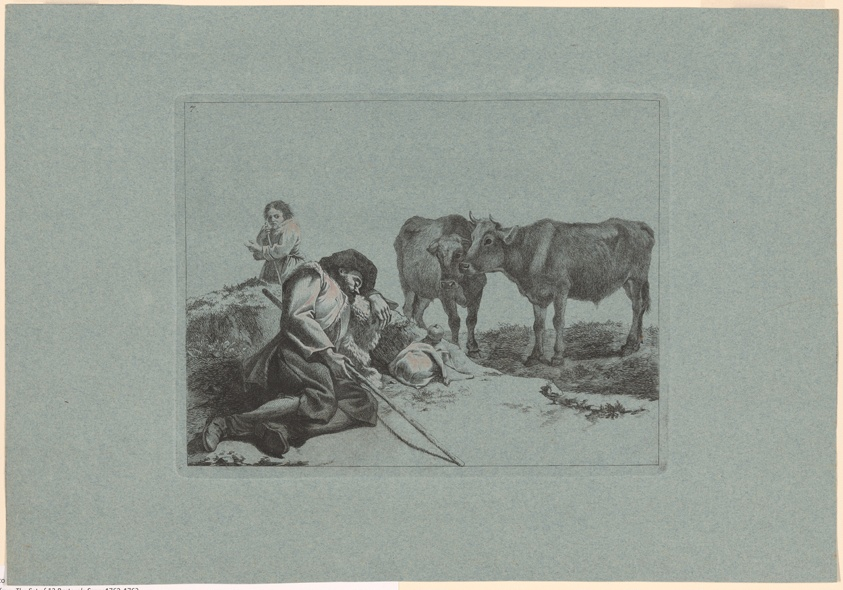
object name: Print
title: Plate 7, from The Set of 12 Pastorals Scenes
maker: Francesco Londonio (Italian, 1723-1783)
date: 1762-63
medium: Etching in black, with white opaque watercolor on blue wove paper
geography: Italy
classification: etching; paper; print; prints and drawing